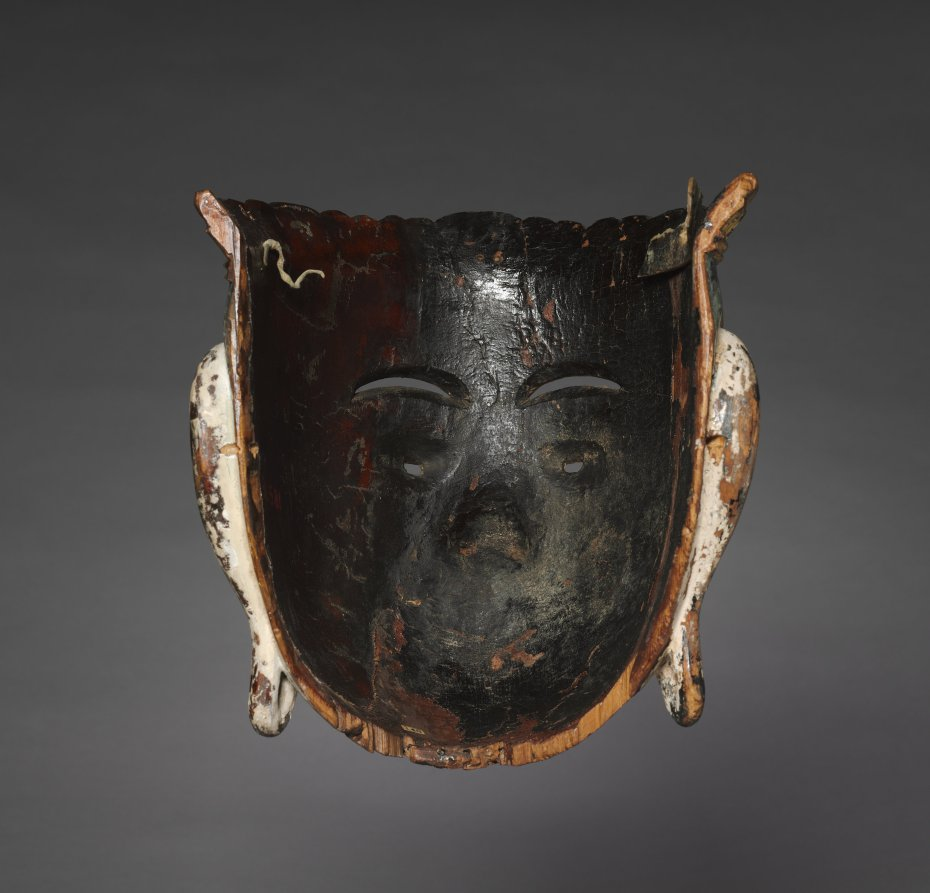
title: Processional Mask of a Bodhisattva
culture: Japan, Heian period (794–1185)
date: late 1100s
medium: wood, lacquered and painted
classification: Sculpture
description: This ceremonial mask was used in a dramatic enactment of the descent of the Buddha Amida and his entourage to welcome the dying to his Pure Land. The mask represents the face of an enlightened being called a bodhisattva. Performances of the welcoming descent had begun by the early 11th century and continue at some temples today.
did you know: The most famous welcoming descent procession happens each year on April 14 at the temple Taimadera in Nara.